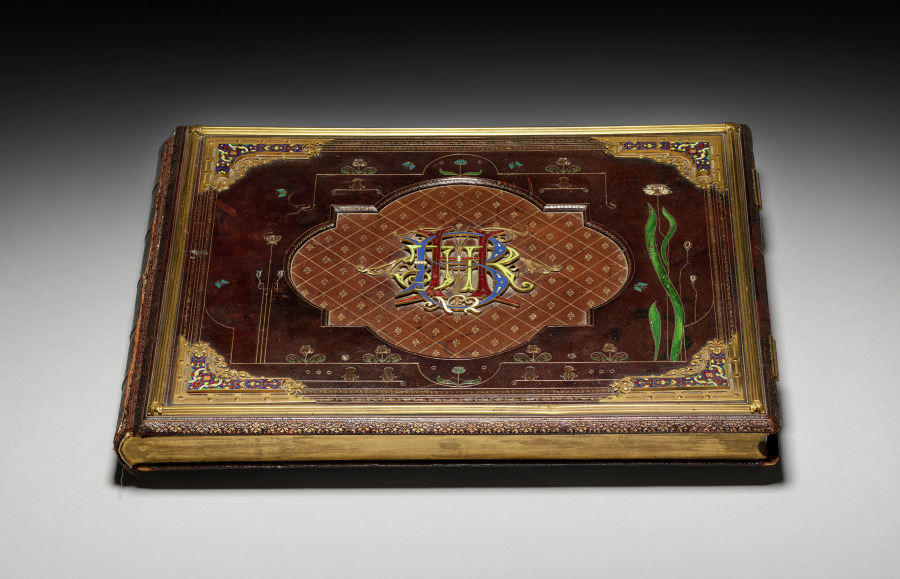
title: Box in the Form of a Book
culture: France(?)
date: c. 1865–80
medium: wooden box covered in leather with gilt metal enameled mounts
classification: Miscellaneous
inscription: central cartouche inset with bronze dore enamel initials, HBJR, N.2 in red, cobalt blue, lime green and white with gilt bronze outline and curliques, inset into medium brown cartouche with a gilt gridwork with each grid filled with a foliate flower, leaves and butterflies in varying sizes.